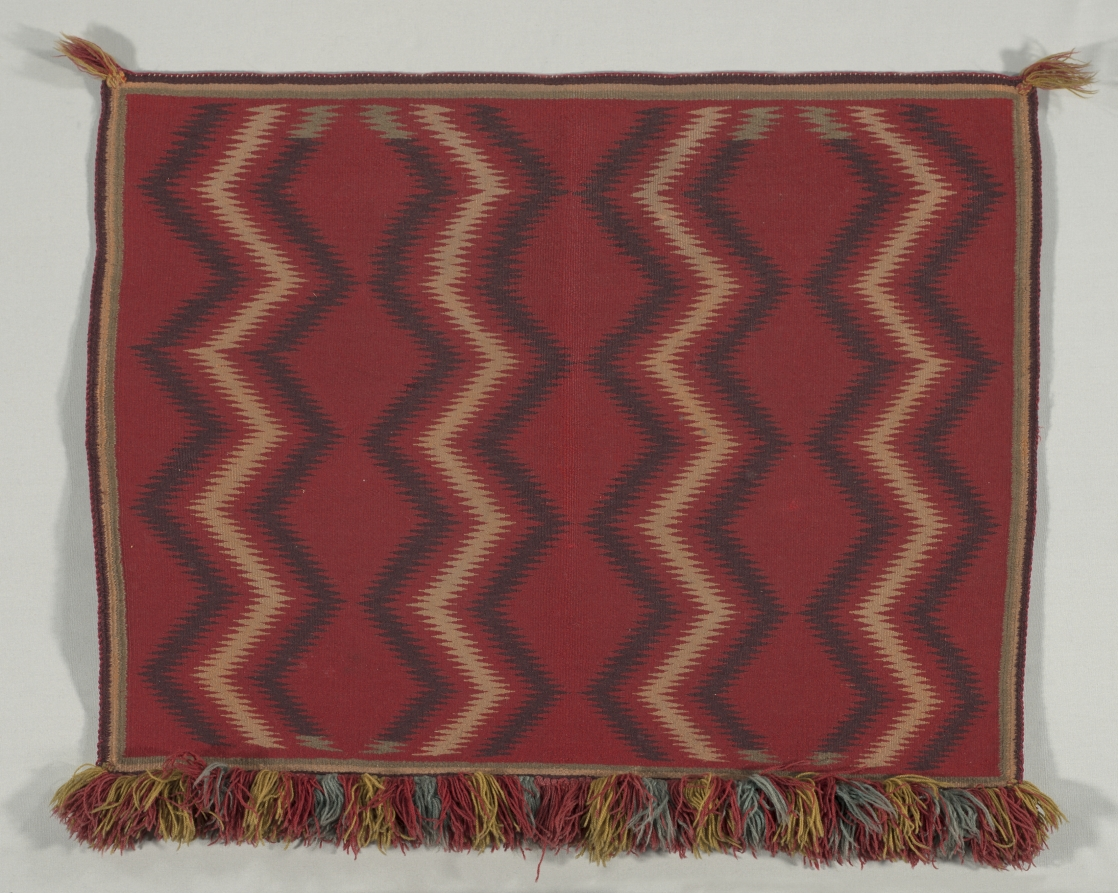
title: Germantown Eyedazzler Saddle Throw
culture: America, Native North American, Southwest, Navajo, Post-Contact, Late Classic Period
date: c.1875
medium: tapestry weave: cotton and wool (handspun and bayeta)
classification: Textile